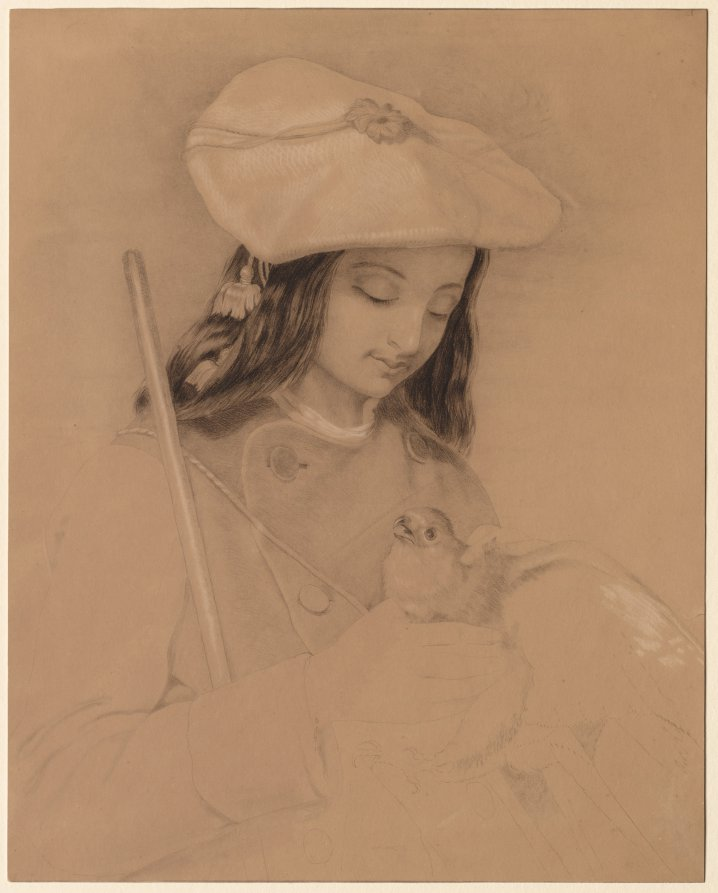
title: Highland Lassie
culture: England, 19th century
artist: Edwin Henry Landseer (British, 1802–1873)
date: c. 1824–73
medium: graphite, charcoal and white chalk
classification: Drawing